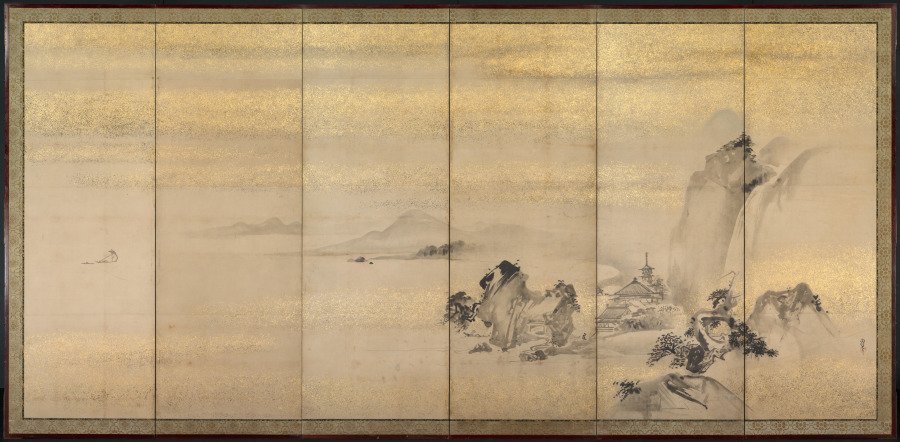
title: Summer and Winter Landscapes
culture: Japan, Edo period (1615–1868)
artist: Kano Naonobu (Japanese, 1607–1650)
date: 1600s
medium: pair of six-panel folding screens; ink on gold- and silver-decorated paper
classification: Painting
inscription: signed: "Jitekisai Naonobu"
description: This sparse composition depicts a summer scene on the right and a winter scene on the left. Careful observation reveals that the pair of screens was once damaged, and a later conservation including new sections of paper and inpainting sought to preserve the original flavor of the paintings so they could continue to be appreciated. Kano Naonobu was born in Kyoto, the younger brother of major painter and authenticator Kano Tan’yū (1602–1674). He relocated to Edo (present-day Tokyo) at the behest of the Tokugawa government in 1630 where he worked with his brother and teacher. In Kyoto, he helped his brother with paintings for Nijō Castle and the major Pure Land Buddhist temple Chion’in.